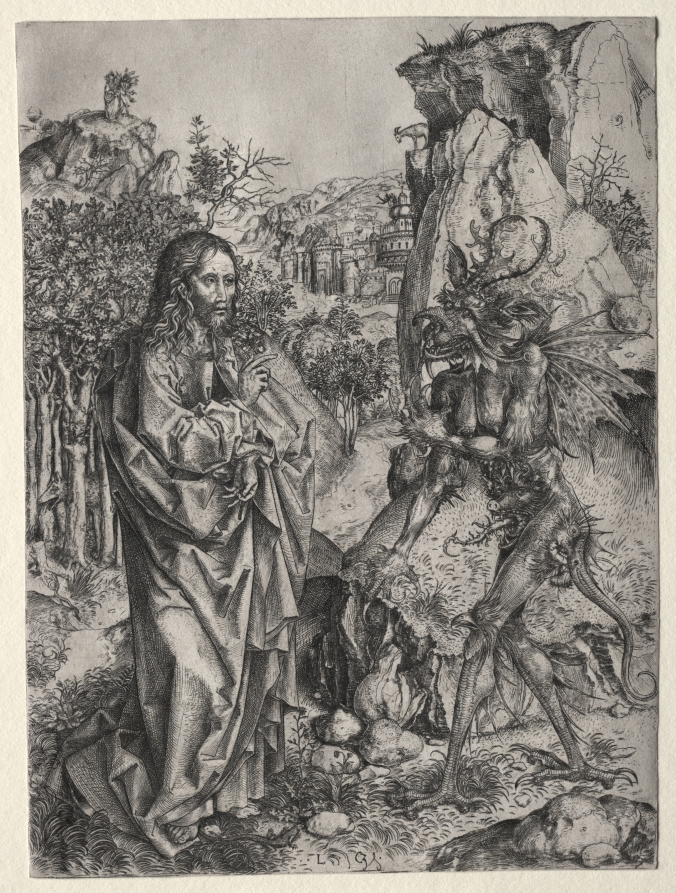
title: The Temptation of Christ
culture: Germany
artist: Master L Cz (German)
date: 1400s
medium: engraving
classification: Print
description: Following his baptism, Christ fasted in the wilderness for 40 days, after which he was tempted three times by the devil. In this scene, the devil points to some stones. “If you are the Son of God, tell these stones to become bread,” the devil taunts. Satan is depicted in a loathsome manner with horns, a scaly body, and wings and claws for hands and feet. Because the desert was the traditional home of demons, temptation in one form or another lay in wait for those who ventured there, as seen here and in the depictions of Saint Anthony of Egypt nearby.